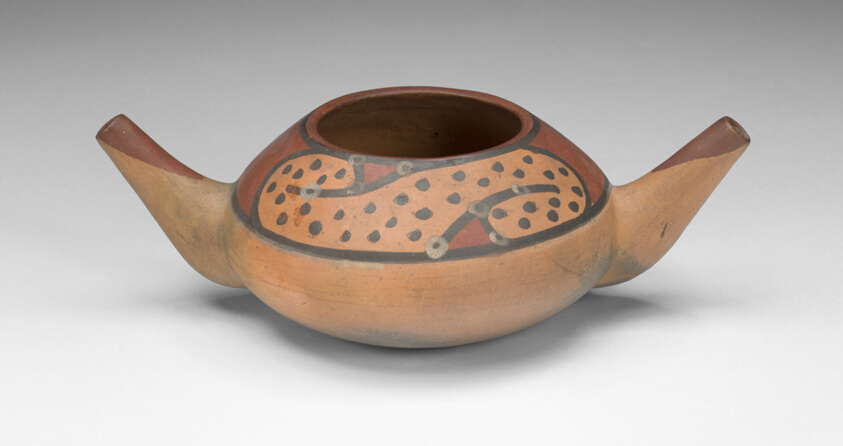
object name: Vessel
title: Small Double Spout Bowl with Repeated Curving Motif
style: lima, Arts of the Americas, south american, peruvian, maranga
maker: Possibly Lima or Maranga; Central coast, Peru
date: c. 500–700 CE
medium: Ceramic and pigment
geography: Peruvian Central Coast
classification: bowl; earthenware; ceramics; vessel; art of the americas